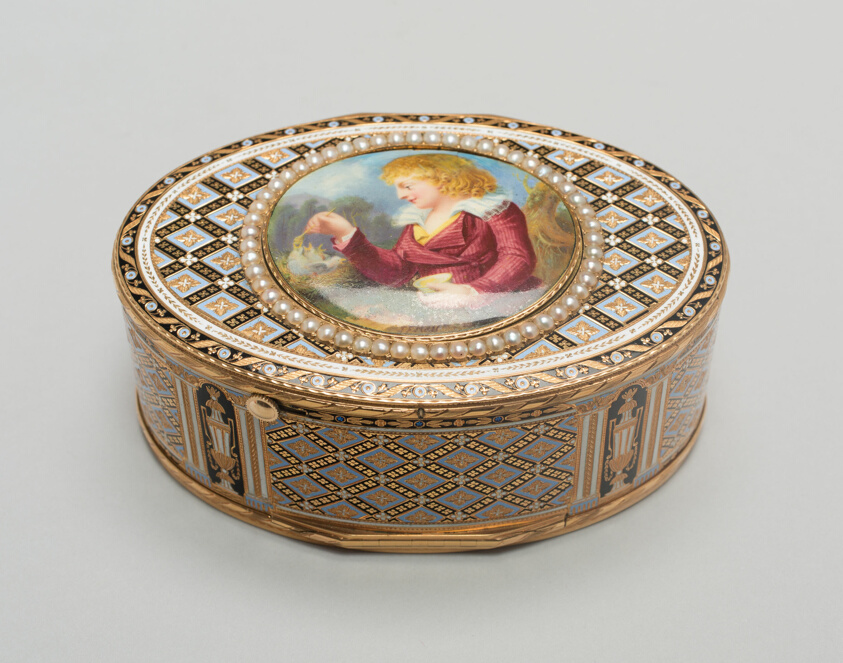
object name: Metalwork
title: Snuff Box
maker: Jacob Frisard; Austrian, 1753-1812; T. F. Heil; Austrian, Unknown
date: Early 19th century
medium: Gold, enamel, pearl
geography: Austria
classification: snuff box; european decorative arts; metalwork